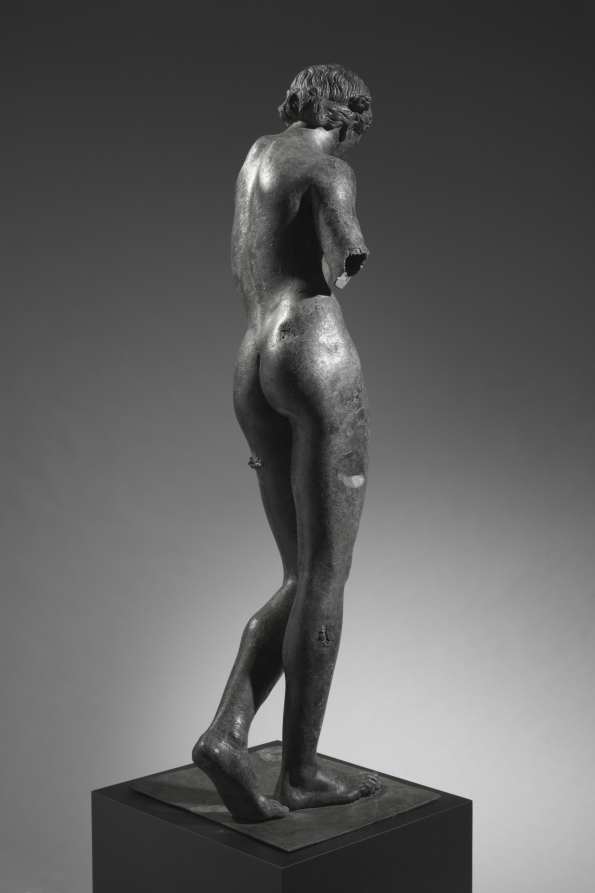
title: The Cleveland Apollo: Apollo Sauroktonos (Lizard-Slayer) or Apollo the Python-Slayer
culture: Greece, Athens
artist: attributed to Praxiteles (Greek, Athenian, c. 400–330 BCE)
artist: or Follower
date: c. 350–200 BCE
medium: bronze, copper, and stone inlay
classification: Sculpture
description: The Cleveland Apollo has been called both Lizard-Slayer (Sauroktonos) and Python-Slayer. The first name comes from the Roman author Pliny the Elder (23–79 CE), who noted in describing bronze works made by the Athenian sculptor Praxiteles (active around 370–330 BCE), “the youthful Apollo [is] known as the Sauroktonos because he is aiming an arrow at a lizard [Greek sauros] which is stealing toward him.” Scholars have long connected this description with artworks showing the young Greek god Apollo in a distinctive pose and hairstyle, standing on his right leg and leaning to his left. In more completely preserved versions, Apollo reaches toward a tree with his left arm and seems to take aim at a lizard. The Cleveland Apollo shows the adolescent god similarly posed and coiffed, making it an important addition to the Apollo Sauroktonos group—the only surviving large-scale bronze sculpture of the type. The young Greek god Apollo, identifiable by his distinctive hairstyle and pose, stands on his right leg and leans to his left, probably toward a now-lost tree. Although now separated, the left forearm and hand survive, together with an unusual lizard-like creature, perhaps drawn from the world of myth. A flat bronze base also remains, though it may be a later adaptation. A tree or other support has been lost, probably smaller than in the marble versions. Given its material and very high artistic quality—note the lifelike hair, fingernails, and inlaid copper lips and nipples—more than one scholar has suggested that the Cleveland Apollo could be the very sculpture seen by Pliny. Some have called the sculpture “Python-Slayer,” seeing the oddly shaped serpentine creature with asymmetrical legs as the mythical Python killed by Apollo in establishing his sanctuary at Delphi. But technical details may explain some of the asymmetry, and no other specific evidence connects it to Delphi. Most scholars would retain the name Sauroktonos (Lizard-Slayer) for the Cleveland Apollo, even as some debate whether it was made by Praxiteles himself or a later follower.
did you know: The Cleveland Apollo is the only surviving large-scale bronze sculpture of its type, Apollo Sauroktonos (the Lizard-Slayer).